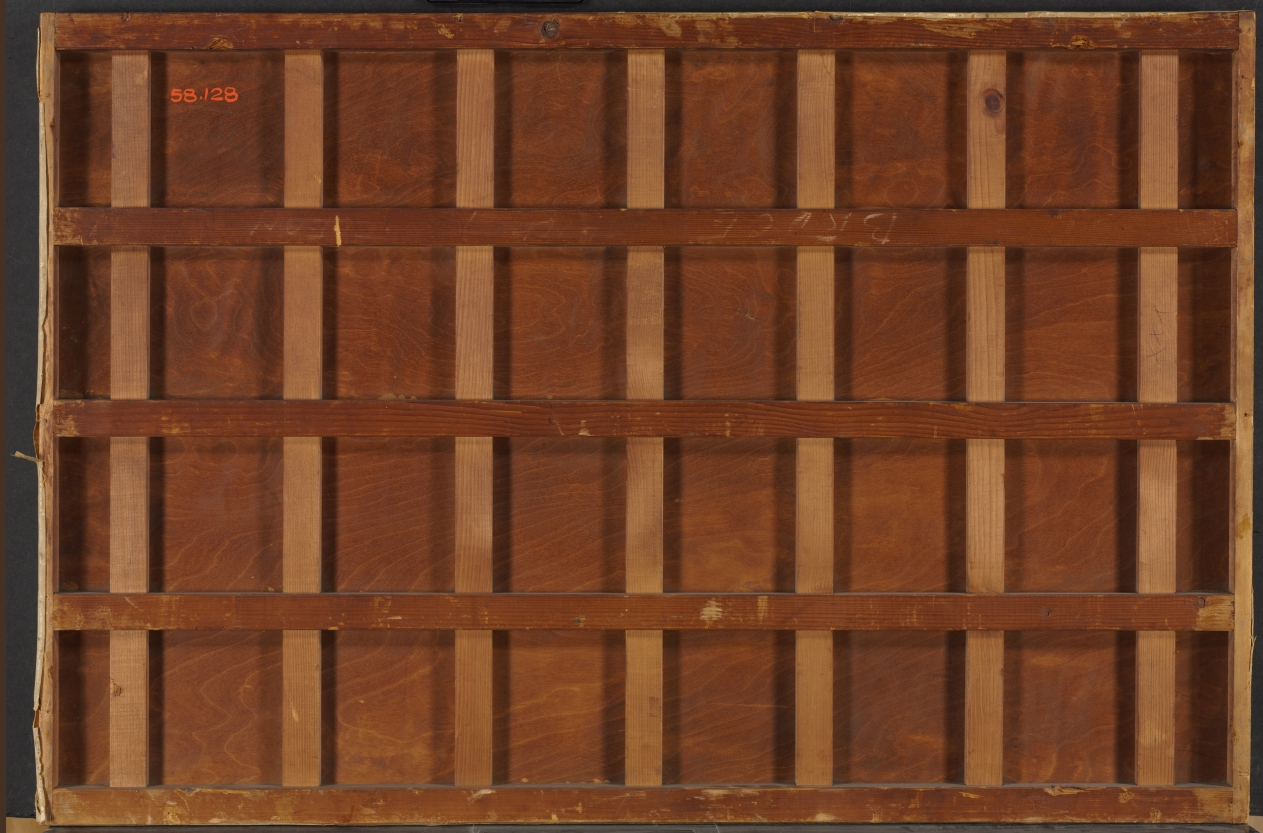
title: The Appian Way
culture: America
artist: Edward Bruce (American, 1879–1943)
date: c. 1929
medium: oil on canvas on panel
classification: Painting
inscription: signed lower right: Edward Bruce